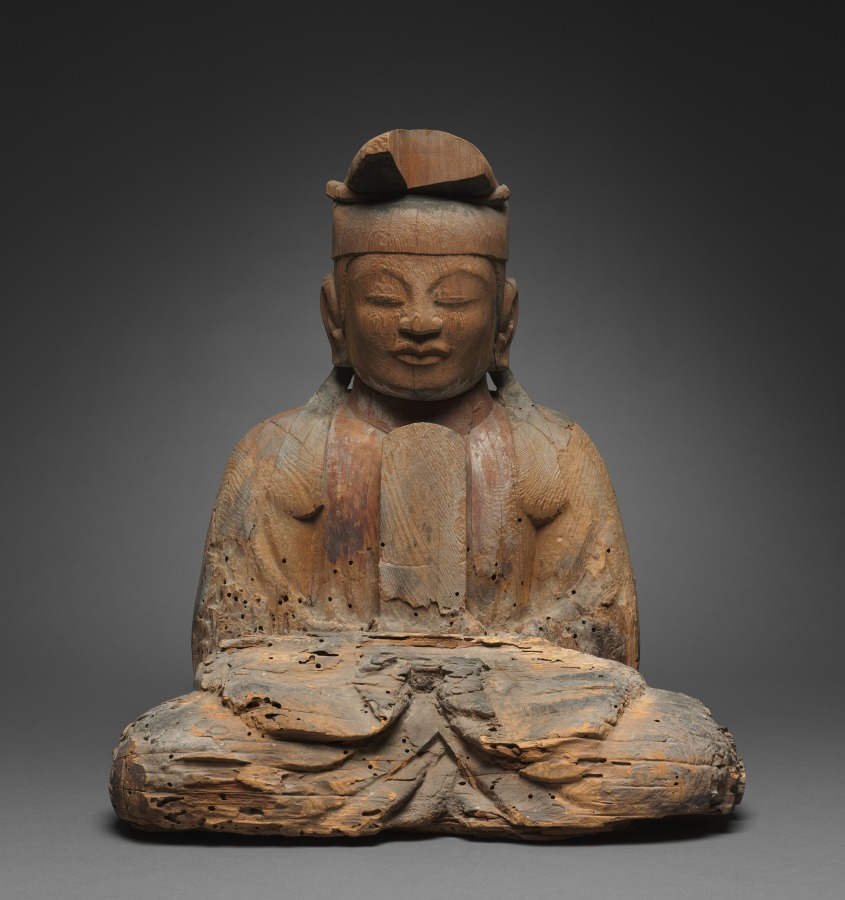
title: Shinto Deities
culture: Japan, Heian period (794–1185)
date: 900s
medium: wood, with traces of polychromy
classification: Sculpture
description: These sculptures represent kami, the name for deities associated with the Japanese religious tradition known as Shinto. They are said to have originally been created for the Usa Hachiman shrine in Oita on the island of Kyushu. Usa Hachiman Shrine houses four main kami: Hime Okami, who assists those engaged in agriculture and sea travel; the legendary 5th-century emperor Ojin deified as the kami Hachiman; Empress Jingu; and the kami of Mount Kawara, who aids copper miners. The identities of these two figures are unknown, but they belong to a larger group containing at least three other deities.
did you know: Traces of pigment on the surface of these sculptures indicate they were once painted.